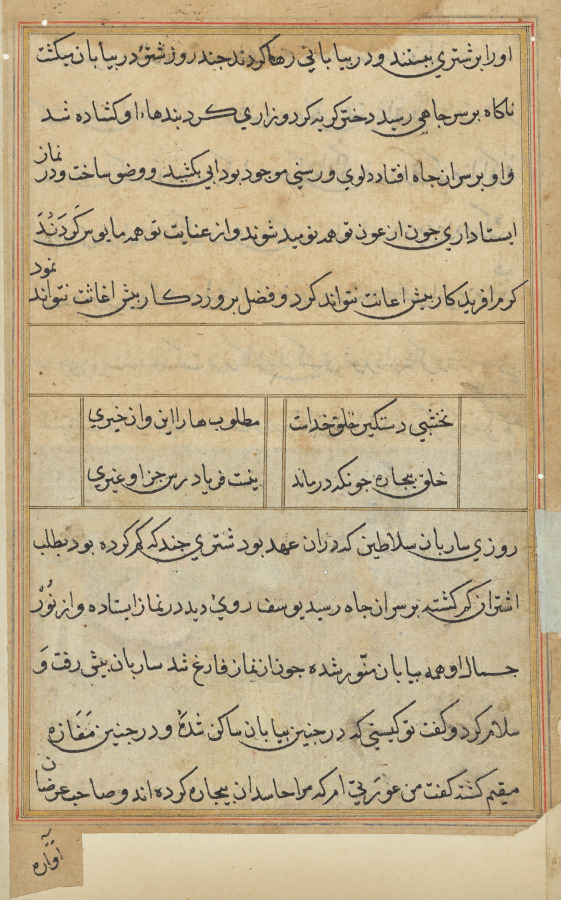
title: Page from Tales of a Parrot (Tuti-nama): text page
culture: Mughal India, court of Akbar (reigned 1556–1605)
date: c. 1560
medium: gum tempera, ink, and gold on paper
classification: Painting